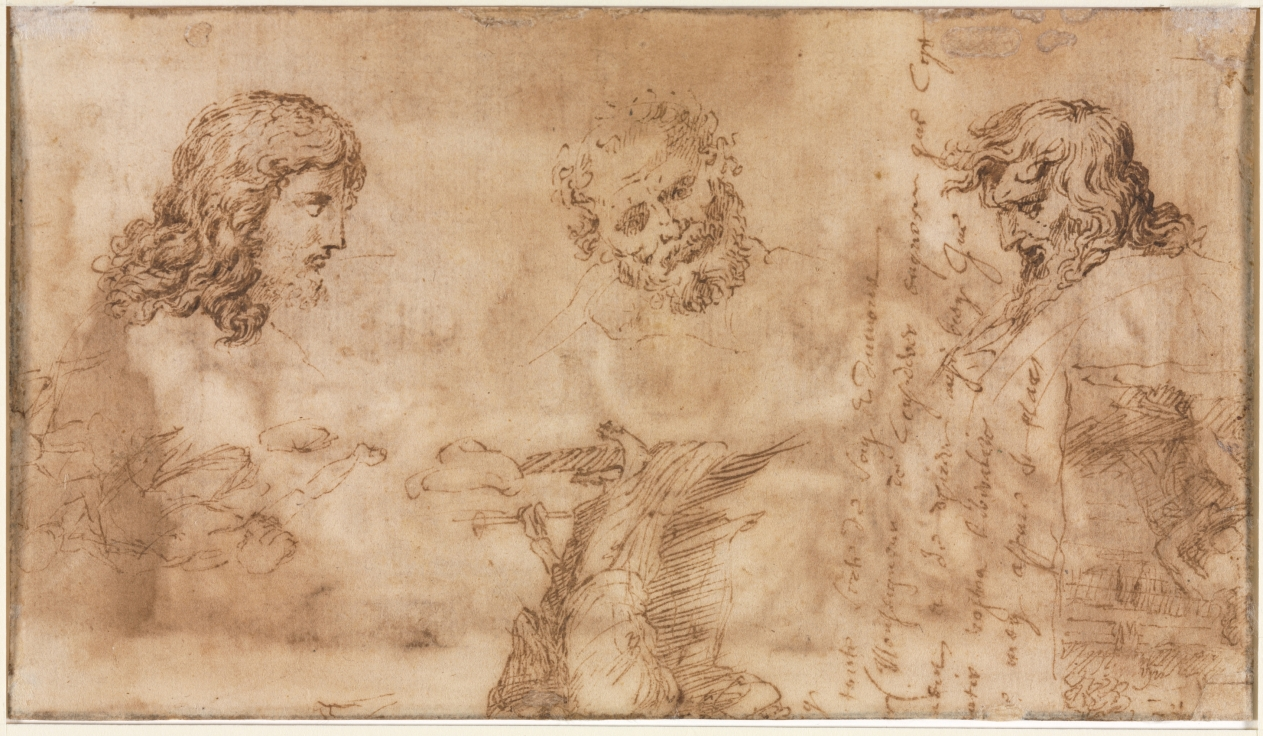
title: Three Heads and Other Sketches (verso)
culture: France, 17th century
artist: Nicolas Poussin (French, 1594–1665)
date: 1643–1644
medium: pen and brown ink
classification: Drawing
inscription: by artist, right, in brown ink: [cropped]y / [cropped] toute sorte de soig et damours / [cropped][y ?] (. Monseigneur de considerer enquore que Cest / [cropped, illegible] et de [illegible]izer aussi bien que / [v]ostre liberalite / [cropped]de moy assurer de pla[ces ?] [sideways] [draft of a letter from Poussin to Paul Fréart de Chantelou, see Cleveland/Cambridge/Ottawa 1989, p. 47]